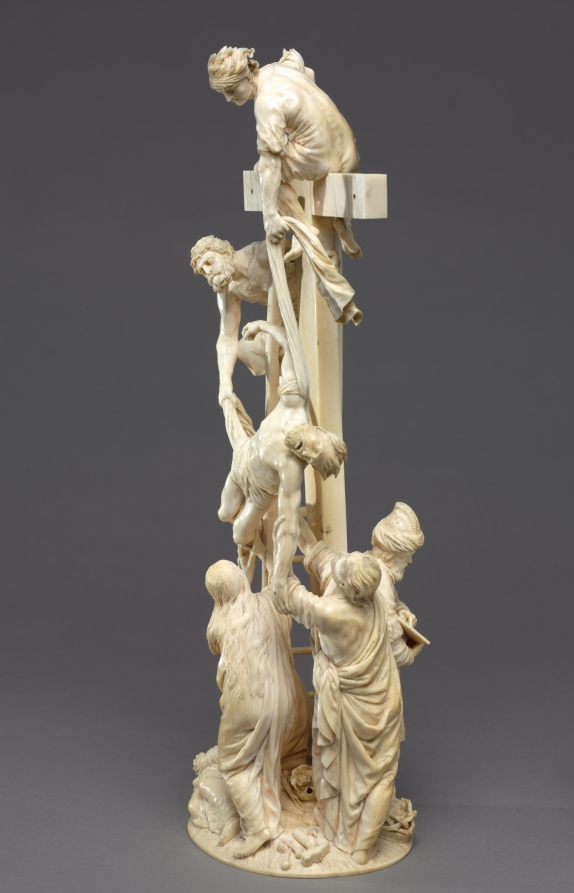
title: Descent from the Cross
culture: Austria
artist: Adam Lenckhardt (German, 1610–1661)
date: 1653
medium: ivory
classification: Sculpture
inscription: inscribed with monogram "AL" conjoined and dated 1653.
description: Carved from a single piece of ivory for Prince Karl Eusebius von Liechtenstein of Vienna, this work is a true tour-de-force. It took Lenckhardt seven years to complete; it is his last known sculpture and the pinnacle of his career. The biblical accounts of the descent from the cross found in the gospels are not consistent, which may contribute to the difficulty in precisely identifying the figures. The Virgin Mary, Saint John, Mary Magdalene, and others were said to be present, but undoubtedly there are other disciples here mourning Christ’s death. The intense emotion registers on the faces of the figures in the scrupulous and exquisitely detailed work.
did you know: Carved from a single elephant tusk, the artist took special care to ensure the ivory did not crack or break as he meticulously crafted each figure in this visually exciting sculpture. Look closely to find tools and small objects included near its base.